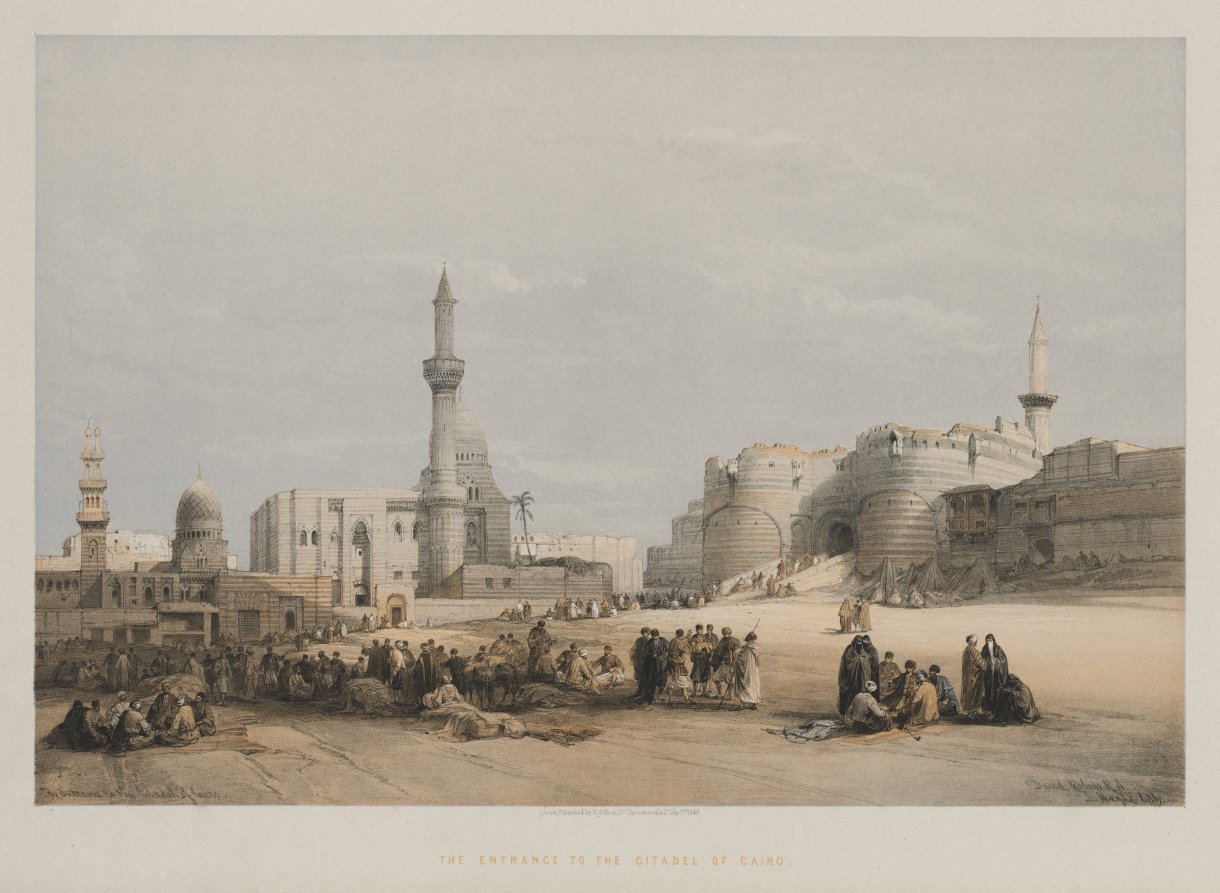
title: Egypt and Nubia, Volume III: The Entrance to the Citadel of Cairo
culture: England, 19th century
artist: Louis Haghe (British, 1806–1885)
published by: F. G. Moon, 20 Threadneedle Street, London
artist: after David Roberts (Scottish, 1796–1864)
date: 1849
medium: color lithograph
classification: Print